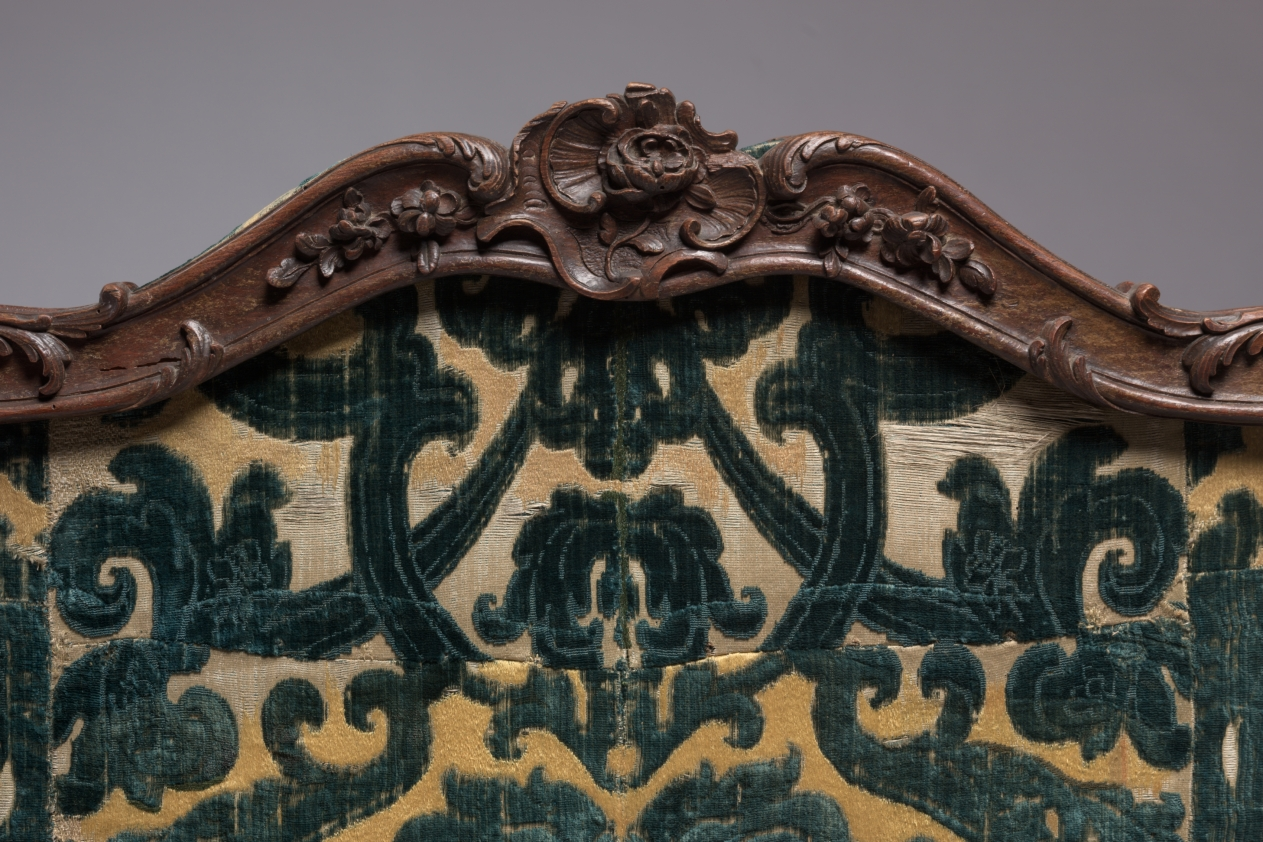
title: Fire Screen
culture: France, 18th century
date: c. 1750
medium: wood and velvet panel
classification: Furniture and woodwork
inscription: inscribed beneath in three places: 32.